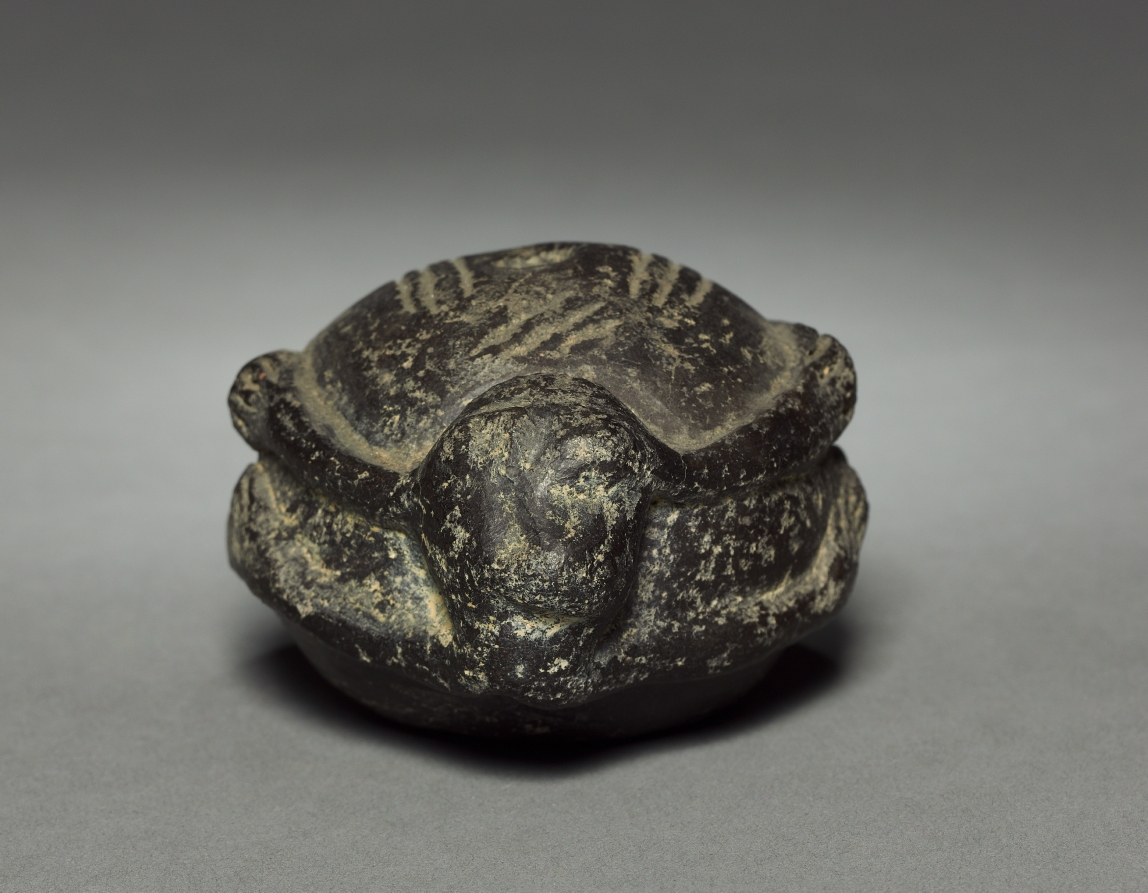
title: Jar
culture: Colombia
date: before 1921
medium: pottery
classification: Ceramic